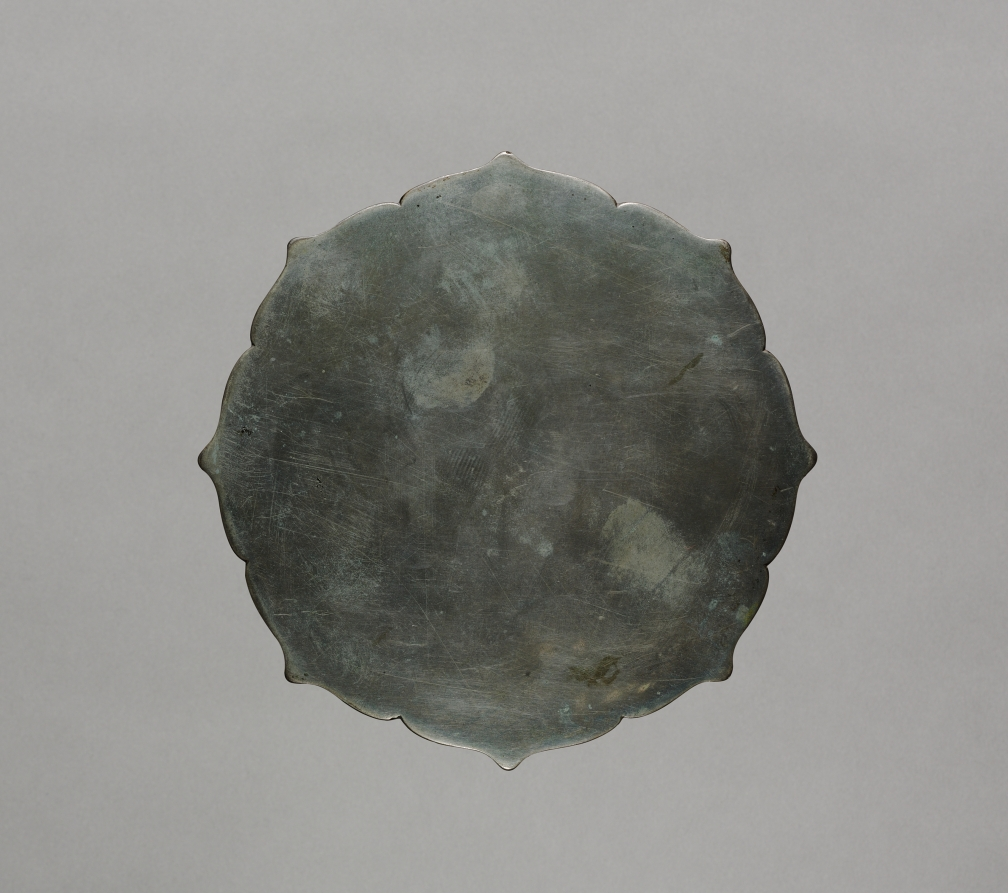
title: Mirror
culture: Japan, Kamakura period (1185–1333)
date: 1185–1333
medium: bronze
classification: Metalwork